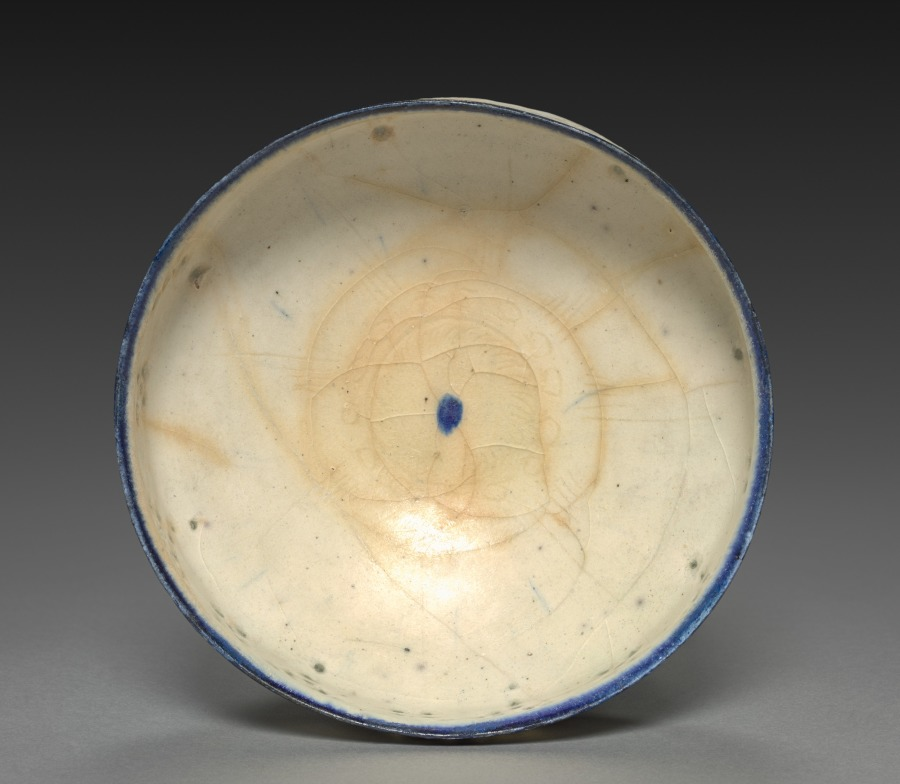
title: Footed Bowl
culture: Iran, probably Kashan, Seljuq period, late 12-early 13th century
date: late 1100s–early 1200s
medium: fritware, pierced and underglaze painting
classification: Ceramic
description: Iranian potters created transparency by piercing and glazing frit-body walls. Here, triangles and rosettes decorate incised scallops beneath the blue rim. The footed shape is derived from Iranian metal bowls.